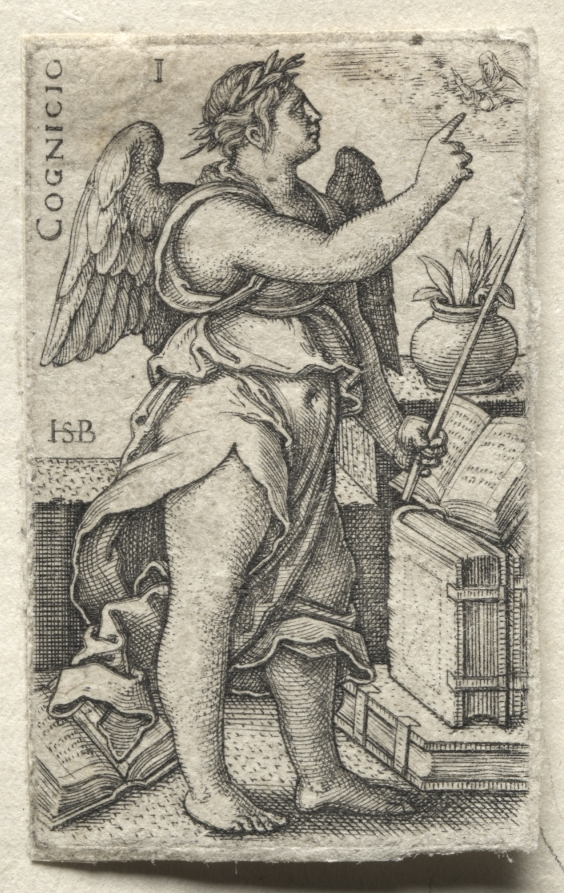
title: The Knowledge of God and the Seven Cardinal Virtues: Knowledge of God - Cognicio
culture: Germany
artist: Hans Sebald Beham (German, 1500–1550)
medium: engraving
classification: Print